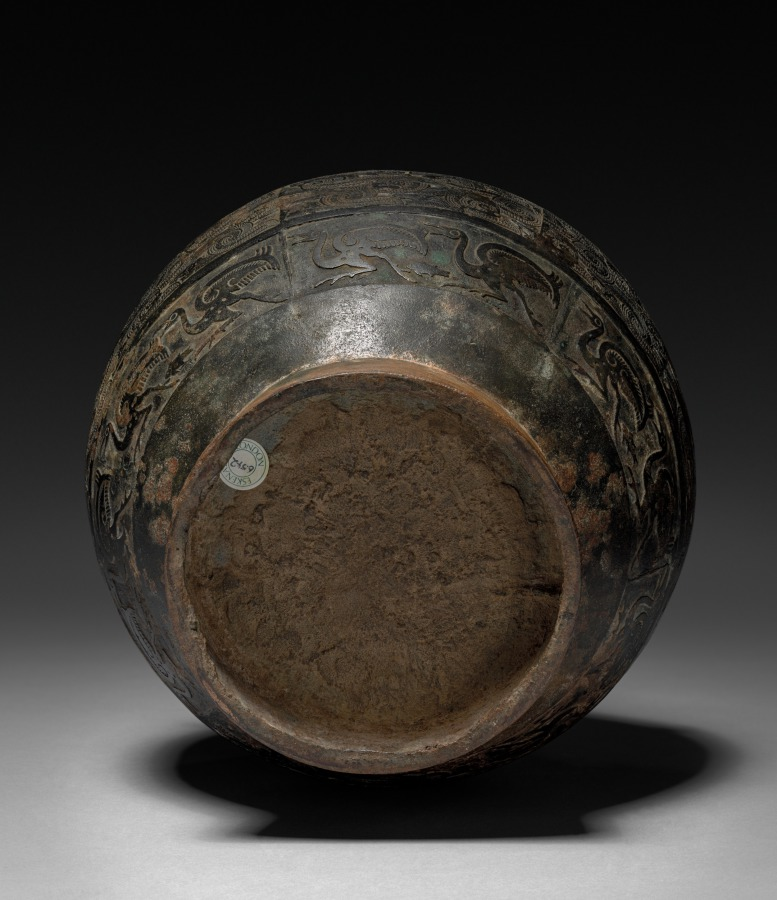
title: Hu (Jar)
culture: China, Eastern Zhou dynasty (770–256 BCE), Warring States period (475–221 BCE)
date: 481–221 BCE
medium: bronze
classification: Metalwork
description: The hunting scenes in flat, low relief on this vessel are among the earliest pictorial scenes in Chinese art, dating from the beginning of the Late Zhou period (481–221 BC). There are six horizontal bands of low relief designs across the body of the vessel. Each is composed of repeating motifs. The short slightly flaring neck has a narrow band of plait pattern, below which is a vivid hunting scene. The hunter holding a long spear and a sword faces off with a feline covered in circle patterns. The main body of the vessel is decorated with two wide bands of interlacing dragons, separated by a band with another hunting scene. This hunter faces two horned beasts whose rear leg has been pierced by a spear. The repeating pattern in the lowest band features two long-legged birds and a small fish.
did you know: On the vessel’s shoulders are applied taotie masks from which stem vertical loops for holding the vessel possibly with a rope.